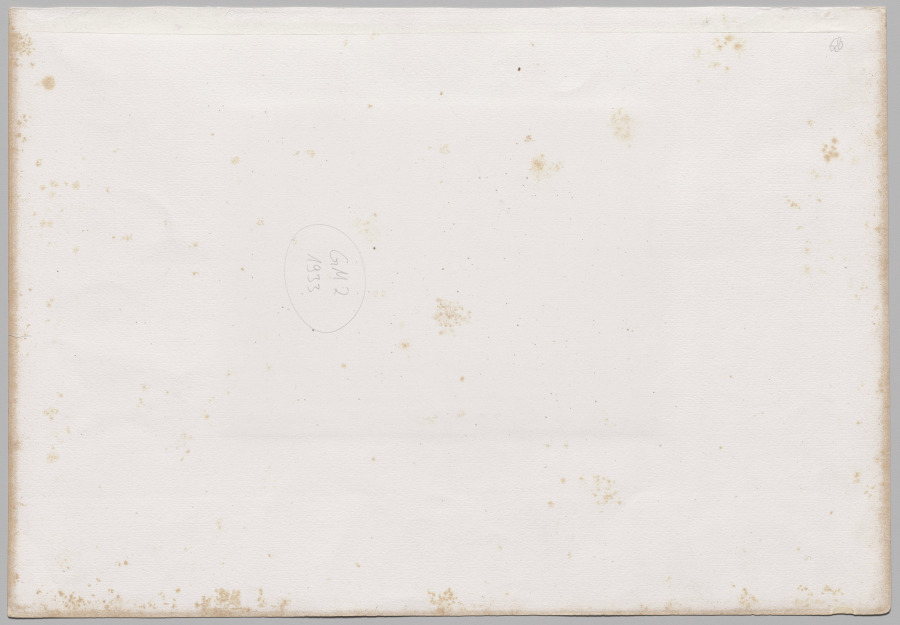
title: Vue générale prise à l'angle sud-ouest, Philoe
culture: France, 19th century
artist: Maxime Du Camp (French, 1822–1894)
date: 1849–50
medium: Salted paper print, Blanquart-Évrard process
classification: Photograph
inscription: Imprinted in black on recto of mount: “NUBIE”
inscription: Imprinted in black on recto of mount: “Maxime Du Camp Gide et Baudry, Editeurs”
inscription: Imprinted in black on recto of mount: “PHILOE/VUE GÉNÉRALE PRISE A L’ANGLE S-O”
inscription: Imprinted in black on recto of mount: “Imprimerie Photographique de Blaquard-Evard, a Lille.”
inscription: Imprinted in black on recto of mount: “Pl. 69”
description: The Temple of Isis at Philae (spelled Philoe by Du Camp) was built on an island 380–362 BC in the Nile. Following construction of the Lower Aswan Dam in 1902, it was reconstructed on a nearby island. This photograph by Du Camp is not only a picturesque image of historically significant ruins but also shows the temple as it looked when still in its original site.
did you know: Maxime Du Camp was the first photographer to depict the marvels of ancient Egypt.